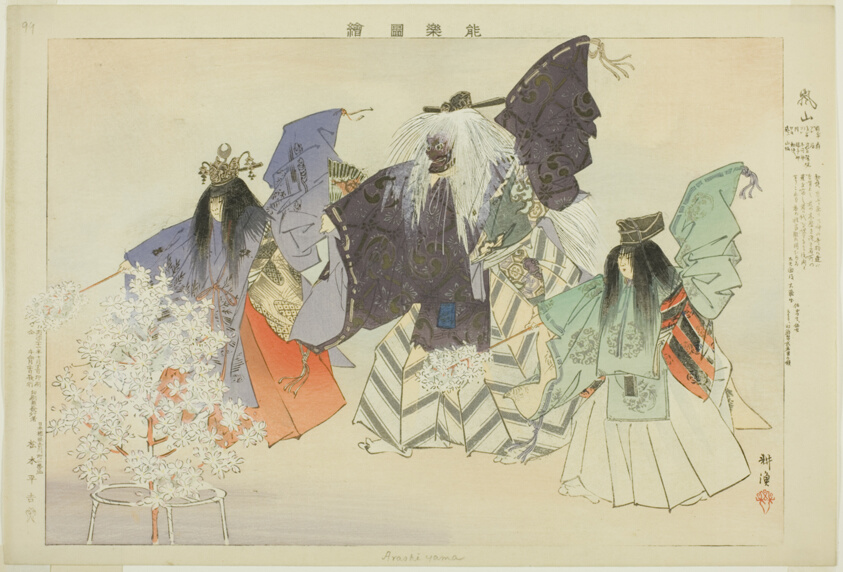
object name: Print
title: Arashiyama, from the series "Pictures of No Performances (Nogaku Zue)"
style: Japanese (culture or style)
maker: Tsukioka Kogyo; Japanese, 1869-1927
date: 1898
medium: Color woodblock print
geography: Japan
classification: woodblock print; print; asian art